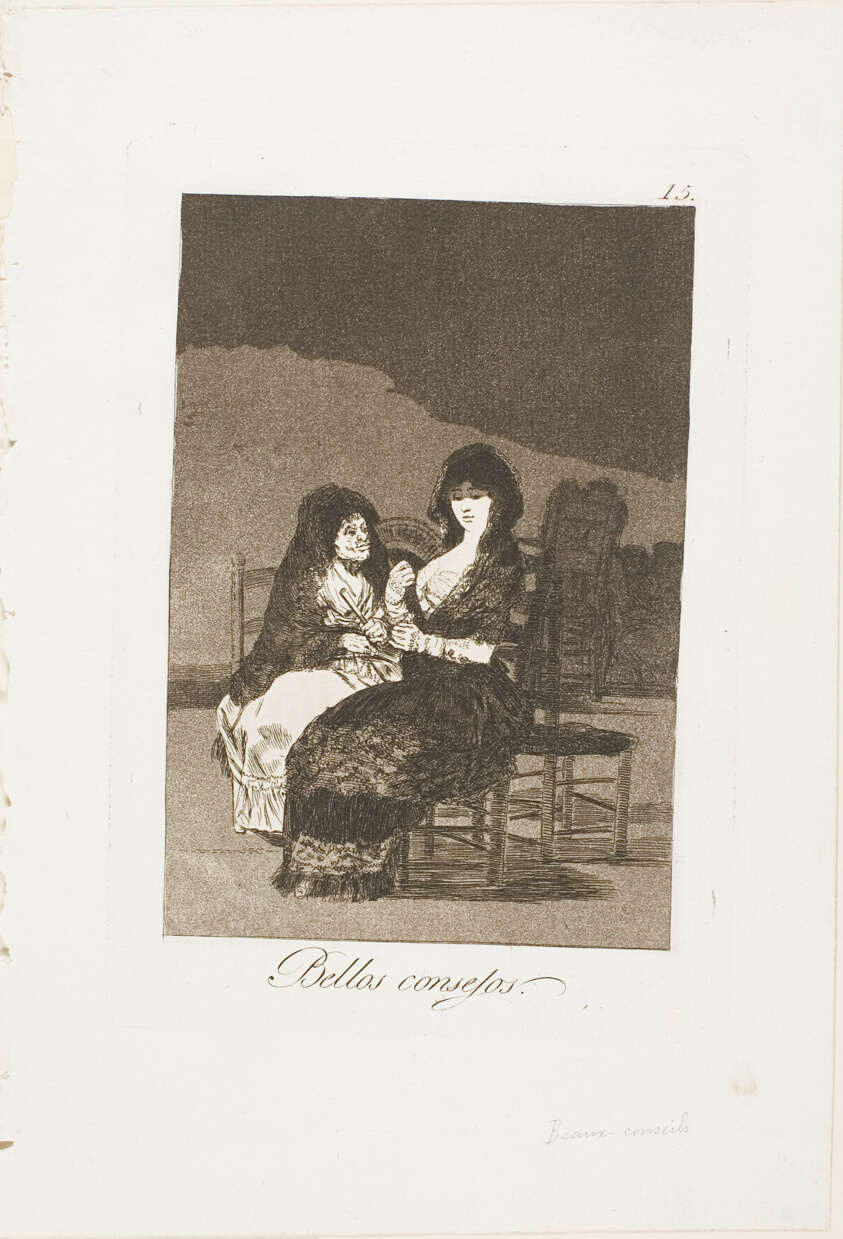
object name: Print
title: Pretty Teachings, plate 15 from Los Caprichos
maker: Francisco José de Goya y Lucientes (Spanish, 1746-1828)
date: 1797/99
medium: Etching and aquatint on ivory laid paper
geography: Spain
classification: etching; print; prints and drawing